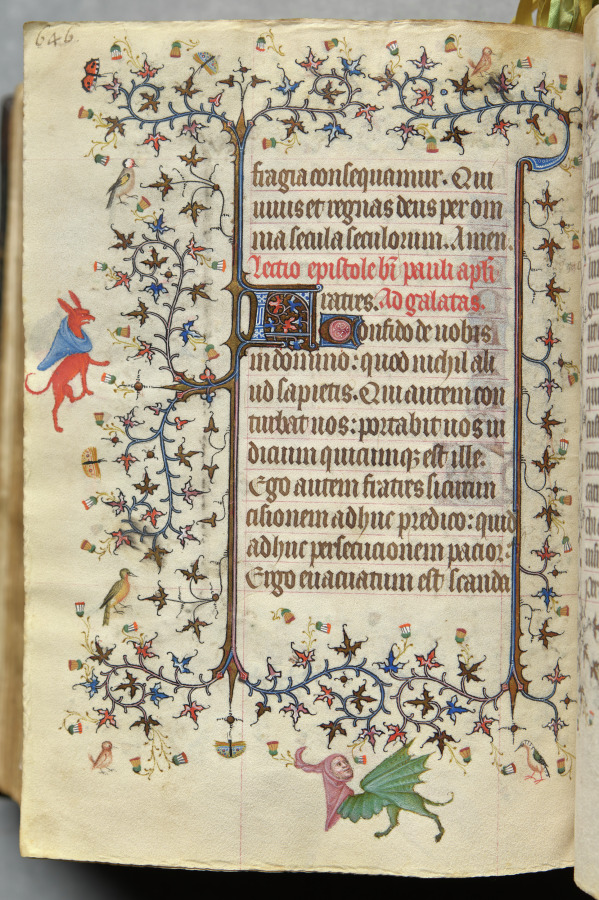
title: Hours of Charles the Noble, King of Navarre (1361-1425), fol. 317v, Text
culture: France, Paris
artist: Master of the Brussels Initials and Associates (French)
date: c. 1405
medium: ink, tempera, and gold on vellum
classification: Bound Volume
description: This precious volume was obviously highly prized by its owner, the French-born King of Navarre, who had his coat of arms painted on no less than twenty folios. Rather than directly commissioning this manuscript from a specific workshop, it seems that Charles the Noble acquired his book of hours -- perhaps ready-made for the luxury market -- while on a trip to Paris in 1404-05. A collaborative effort, six painting styles are evidenced within the pages of this codex, those of two Italians, two Frenchmen, and two Netherlanders. The painter who was responsible for the planning and decoration of the book, and who produced seventeen of the large miniatures, was a Bolognese artist known as the Master of the Brussels Initials. His principal assistant, responsible for most of the borders, was a Florentine who signed his name "Zecho" da Firenze on folio 208 verso.